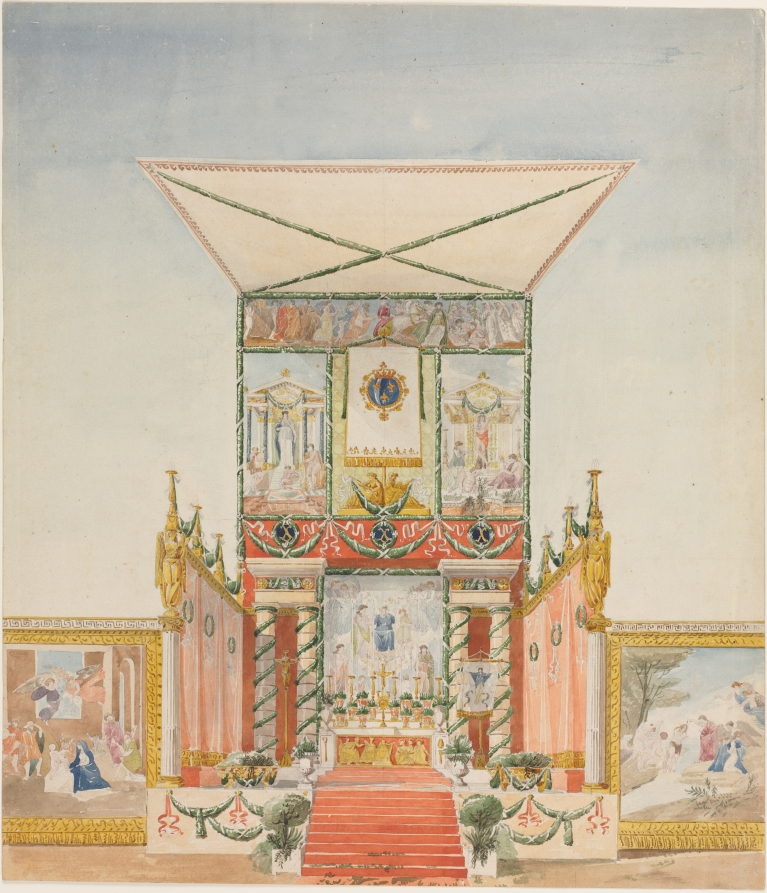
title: Portable Field Altar for Charles X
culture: France, 19th century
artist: Alexandre Denis Abel de Pujol (French, 1787–1861)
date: 1824–1830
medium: watercolor with graphite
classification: Drawing